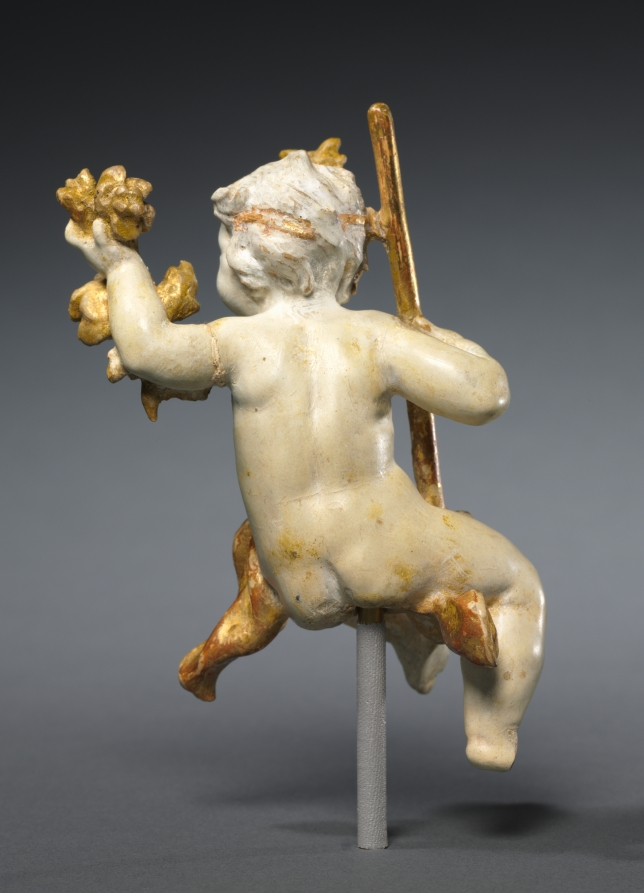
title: Putto as Spring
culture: Germany, 18th century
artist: Ferdinand Tietz (Austrian, 1708–1777)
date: c. 1765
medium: painted and gilded wood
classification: Sculpture